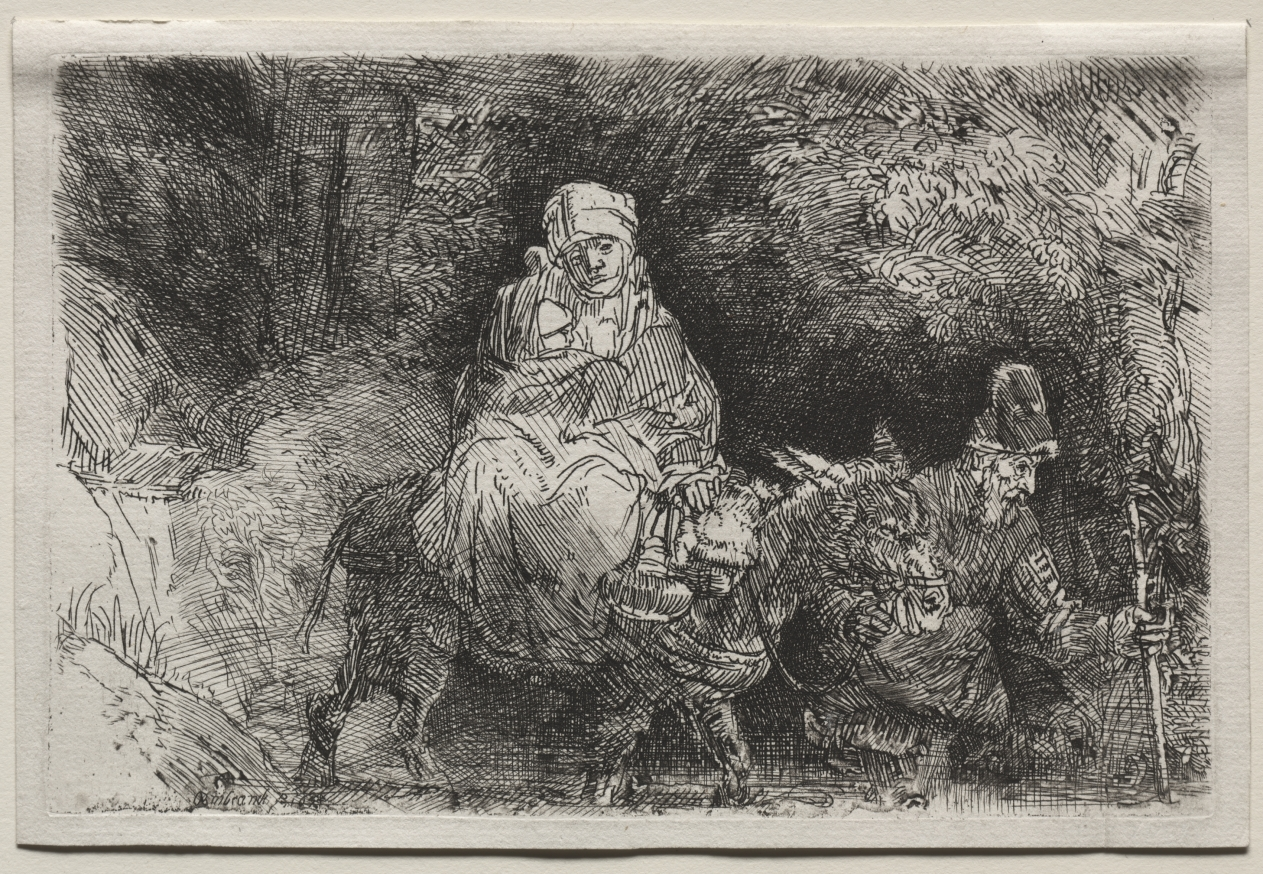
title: The Flight into Egypt: Crossing a Brook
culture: Netherlands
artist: Rembrandt van Rijn (Dutch, 1606–1669)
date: 1654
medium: etching and drypoint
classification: Print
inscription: lower left, in plate: Rembrandt f. 1654 ; VERSO, upper right, in graphite: [illegible]/B. 55 ; lower left, in graphite: R1348U ; lower left, in graphite: R 467t ; lower center, in graphite: C 11942 ; lower right, in graphite: B. 55 ; lower right, in graphite: D[dg?] ; lower right, in pen and brown ink: [a?]4